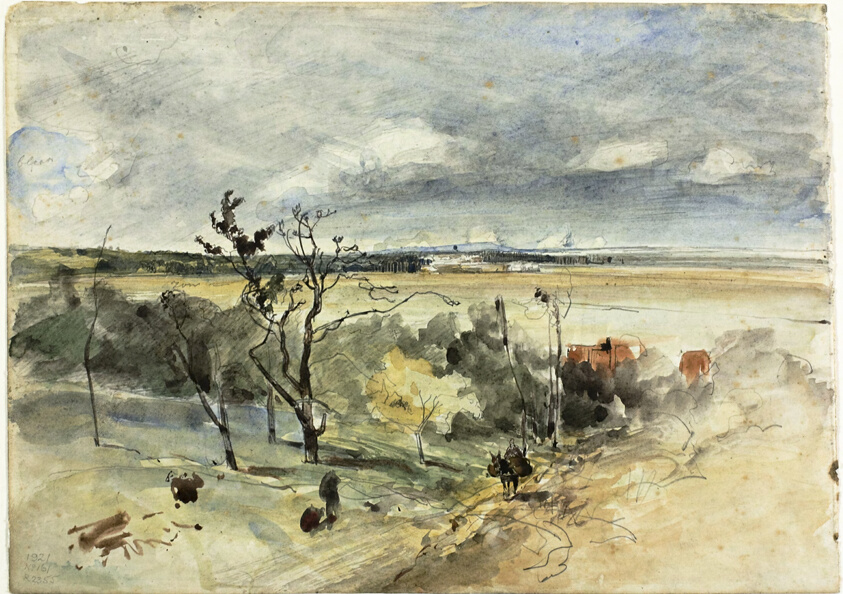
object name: Drawing and Watercolor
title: Landscape with Man on a Donkey (recto) Two Women in a Cafe (verso)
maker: Johan Barthold Jongkind (Dutch, 1819-1891)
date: c. 1849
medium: Watercolor, with graphite, on ivory wove paper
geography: Holland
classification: watercolor; drawings (visual works); prints and drawing